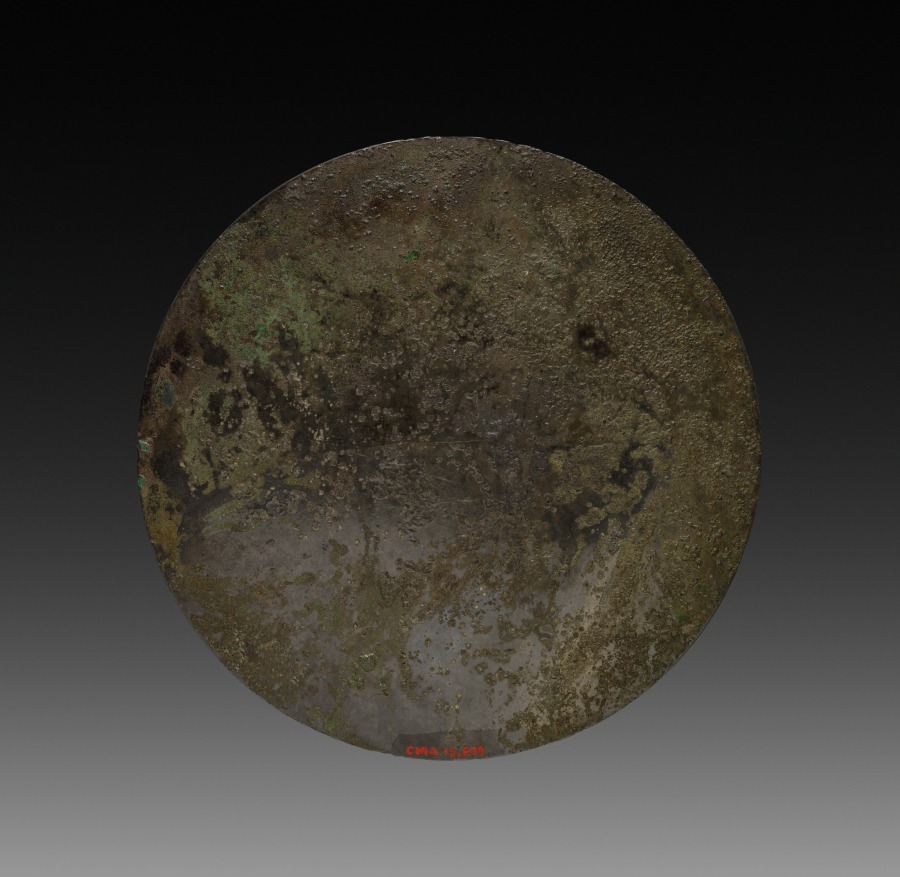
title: Mirror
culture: China, Eastern Han dynasty (25–220 CE)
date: 25–220 CE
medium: bronze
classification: Metalwork